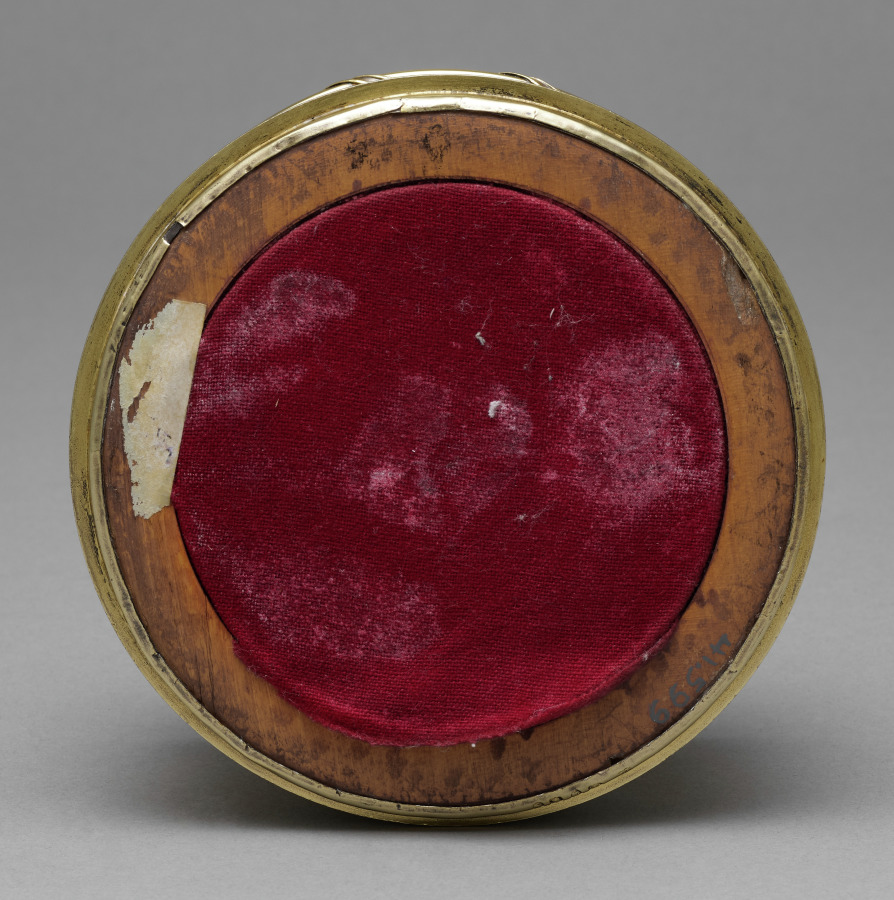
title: Decanter Stand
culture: England, London, 19th century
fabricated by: Paul Storr (British, 1771–1844)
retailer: Rundell, Bridge and Rundell (British, 1797–1834)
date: 1814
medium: silver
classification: Silver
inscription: Engraved on rim of base: "RUNDELL BRIDGE ET RUNDELL AURIFICES REGIS ET PRINCIPIS WALLIAE REGENTIS BRITANNIAS." Engraved on base of interior: Unidentifiable crest with bird over other animal.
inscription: Scratched on rim of base: "6625"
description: Decanter stands served as coasters for glass wine bottles in order to protect the extremely expensive and fragile linen tablecloths they sat upon. This example contains depictions of large grape vines and youthful figures that evoke the Roman god of wine, Bacchus (or Dionysus in Greek mythology). One of the young boys grasps an empty drinking vessel while the other leans against a panther, the frequent companion of Bacchus.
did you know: Bacchanal motifs of grapes and consumption echo this object’s function as a stand for a wine decanter.